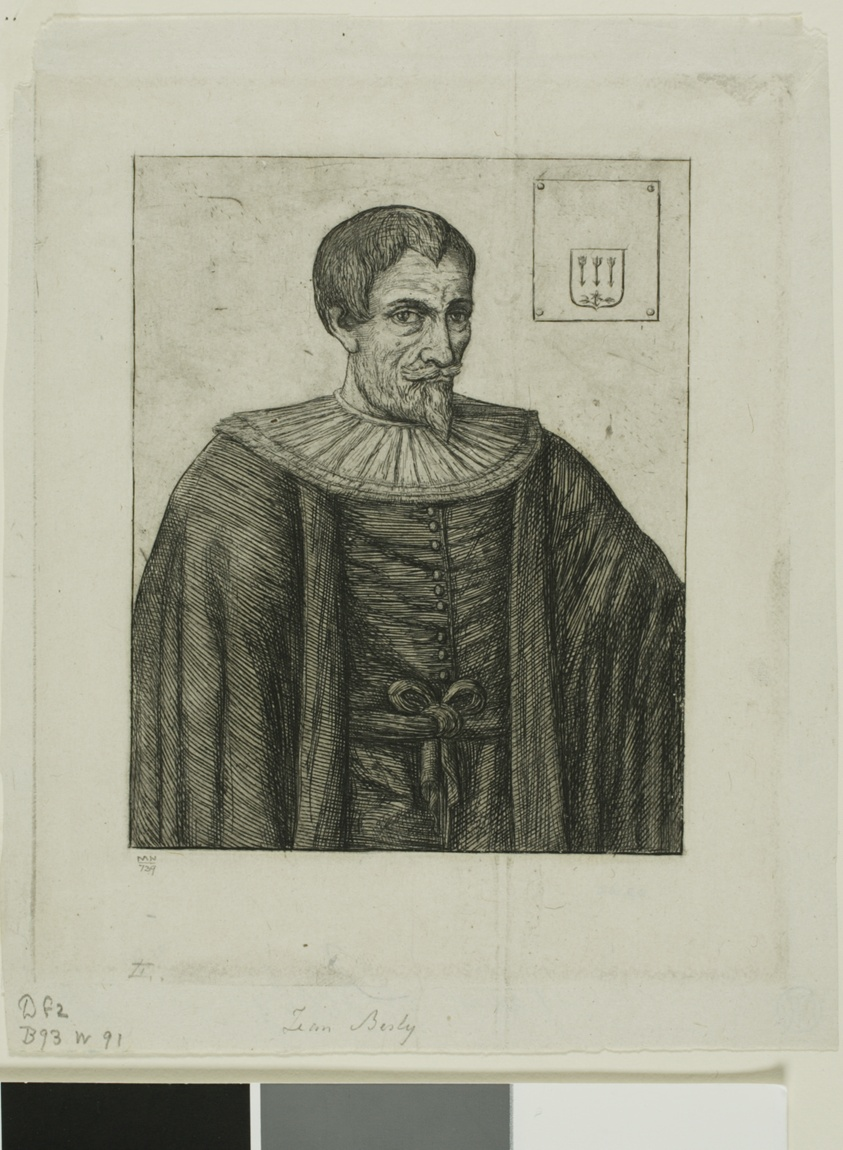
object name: Print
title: Portrait of Jean Besly, Historian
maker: Charles Meryon (French, 1821-1868); after Jaspar de Isaac (Dutch, died 1654)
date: 1861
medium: Etching on grayish ivory laid chine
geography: France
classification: etching; print; prints and drawing